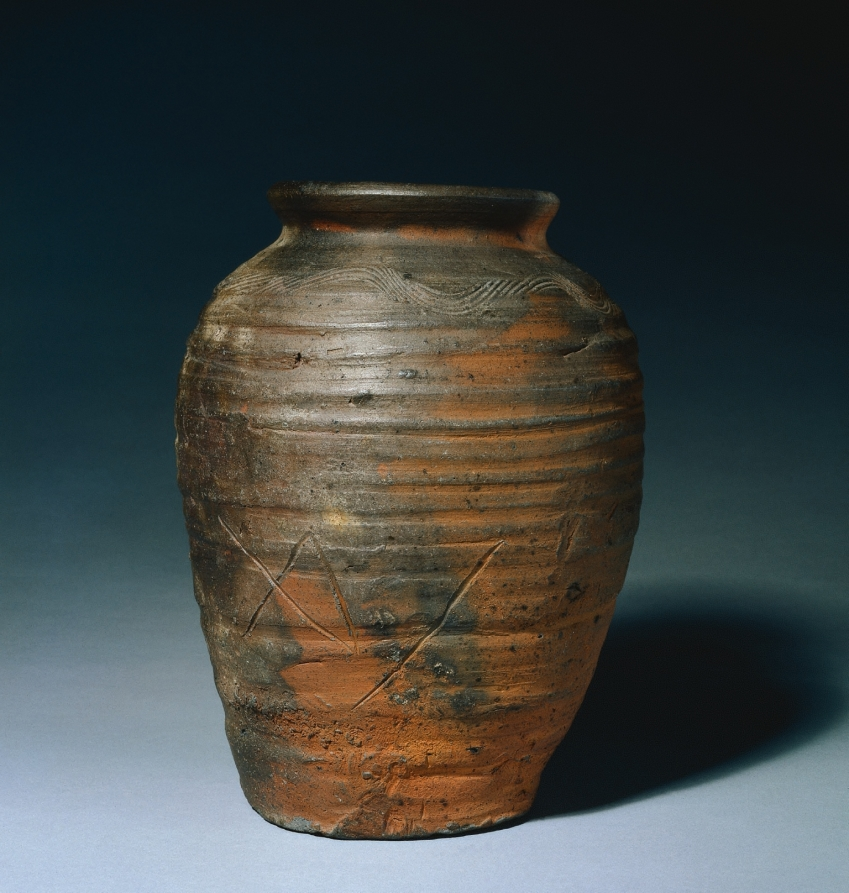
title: Storage Jar: Bizen Ware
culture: Japan, Muromachi period (1392–1573)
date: late 1400s-early 1500s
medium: stoneware with natural ash glaze, incised comb pattern, and incised potter's mark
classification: Ceramic